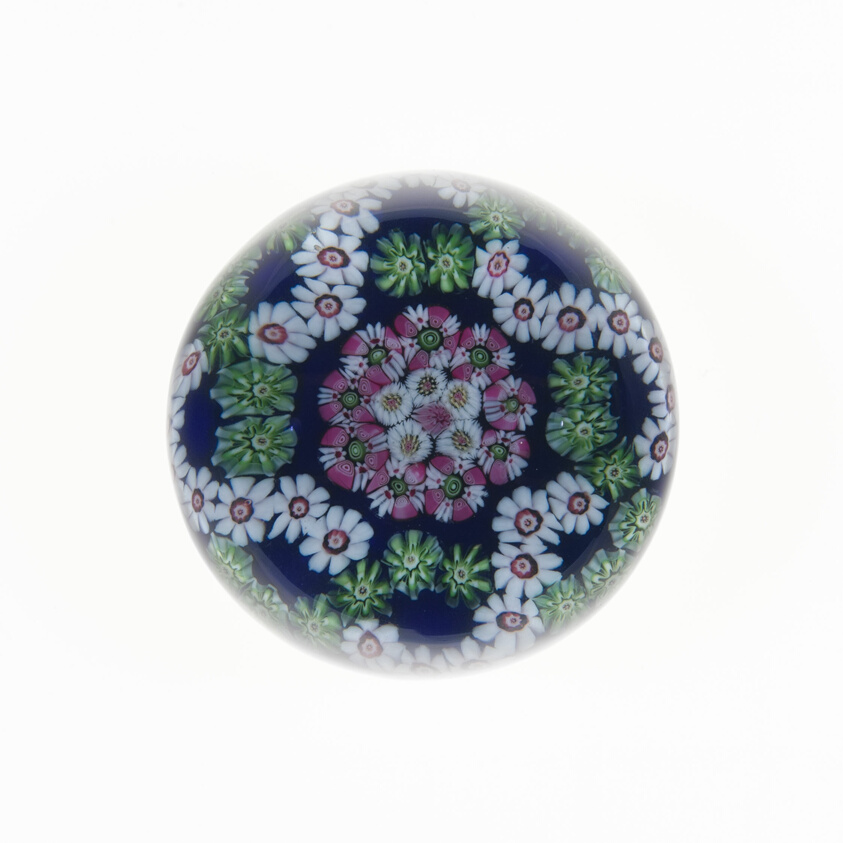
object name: Glass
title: Paperweight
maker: Clichy Glassworks (Cristalleries de Clichy); Clichy, France, 1837-1885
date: c. 1845/60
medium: Glass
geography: France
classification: paperweight; glass